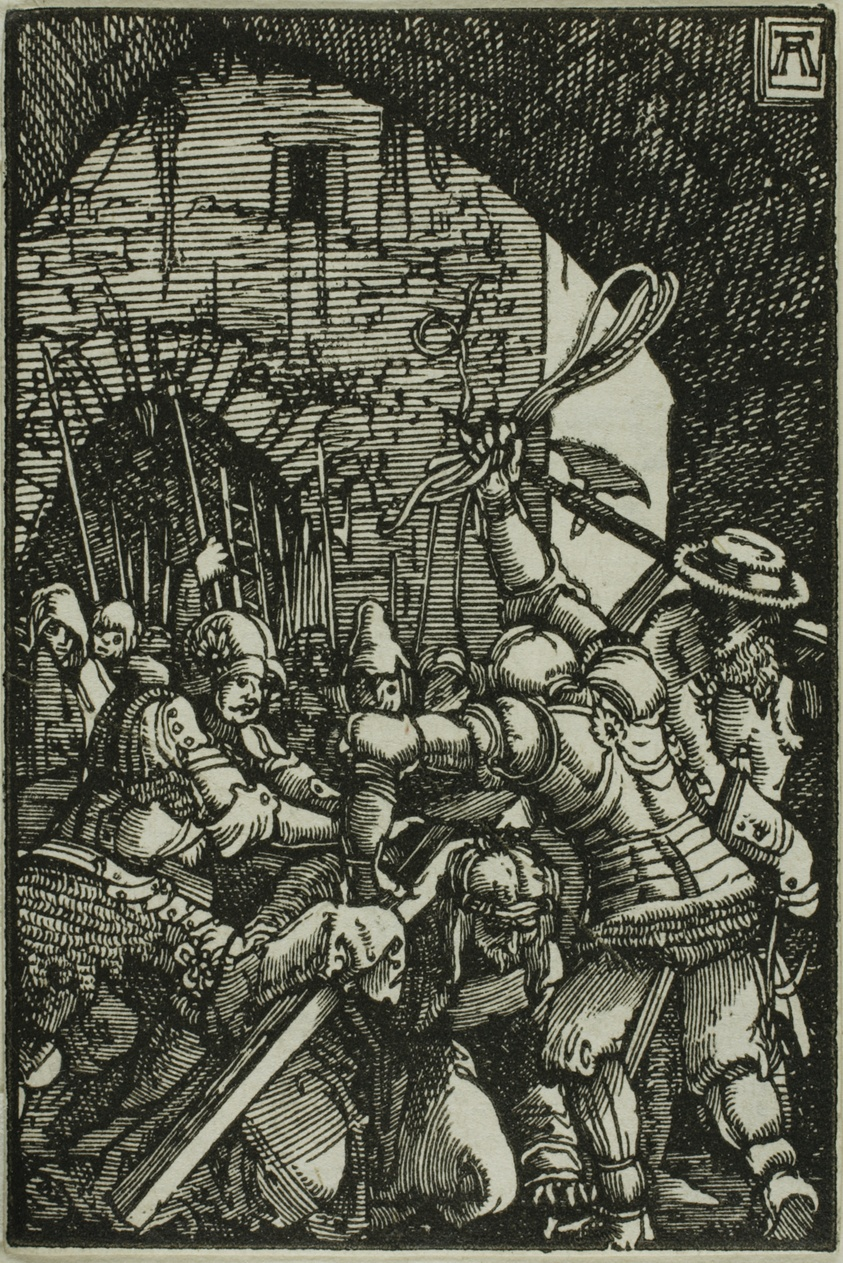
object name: Print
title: Bearing of the Cross, from The Fall and Redemption of Man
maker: Albrecht Altdorfer (German, c.1480-1538)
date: 1513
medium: Woodcut in black on ivory laid paper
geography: Germany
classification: woodcut; print; prints and drawing